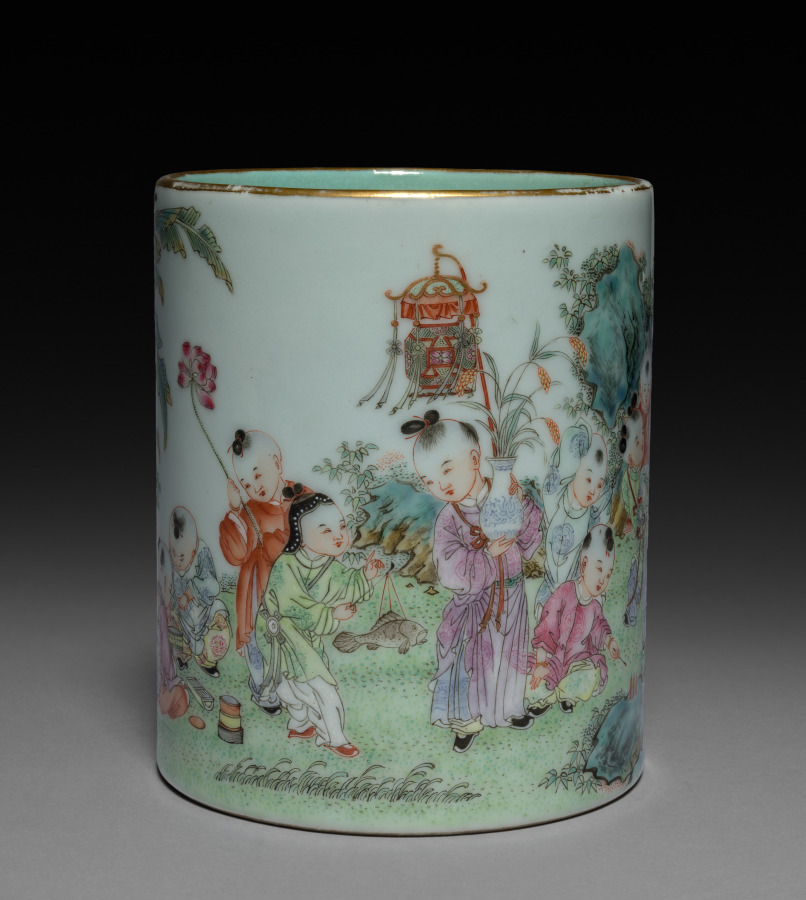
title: Cylindrical Brushholder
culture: China, Qing dynasty (1644–1911), Qianlong reign (1736–95)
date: 1736–95 or later, mid-1800s?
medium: porcelain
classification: Ceramic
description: The brush holder shows children celebrating seasonal festivals, pursuing games, and masquerading as adults with attributes that suggest their future careers in the military or civil service. Three boys play in the shadow of a garden rock with cricket cages; others parade a boy on a goat who wears the headgear of a scholar who passed first in the state examinations. Left to the goat kneels a boy who is about to ignite fire crackers lined up on a stone, a custom to celebrate the New Year. Moreover, the combinations of motifs form puns that express auspicious wishes.